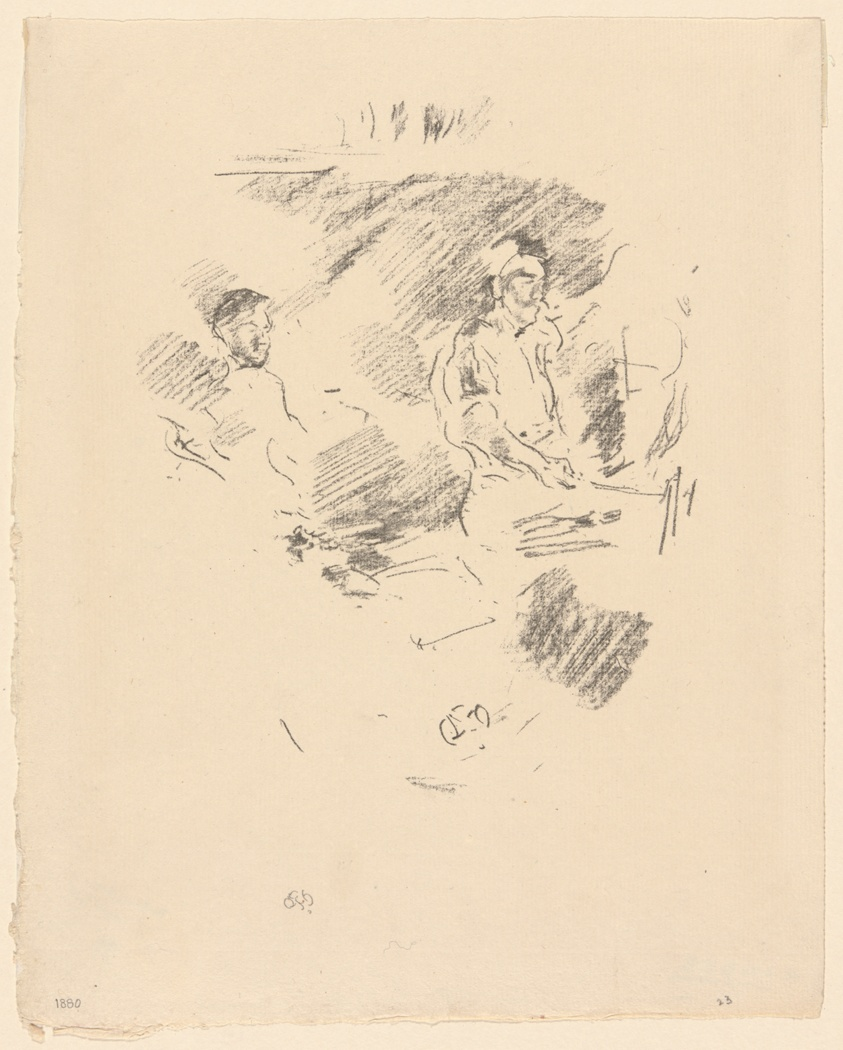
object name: Print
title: The Strong Arm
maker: James McNeill Whistler (American, 1834-1903)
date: 1895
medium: Transfer lithograph in black on ivory laid paper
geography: United States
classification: transfer lithograph; lithograph; print; prints and drawing; paper